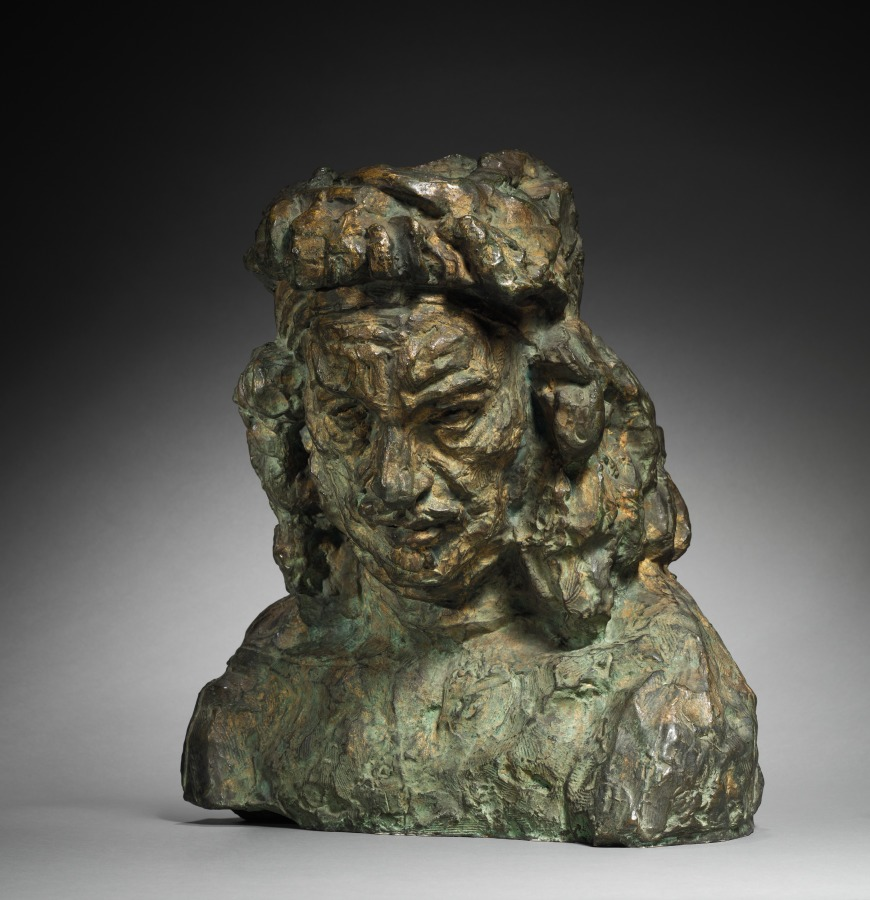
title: The End of Rembrandt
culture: France, 20th century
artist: Emile Antoine Bourdelle (French, 1861–1929)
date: 1909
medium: bronze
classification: Sculpture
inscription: Dated: "1909"